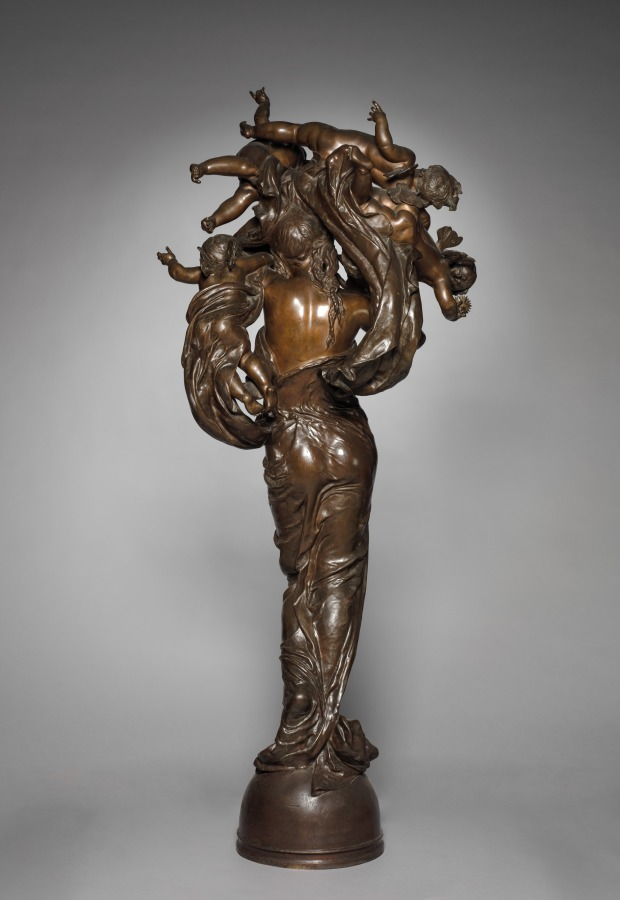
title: Dawn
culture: France, 19th century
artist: Gustave-Joseph Chéret (French, 1838–1894)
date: c. 1883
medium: bronze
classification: Sculpture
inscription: signed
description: This sculpture is of the same design as one exhibited by Chéret at the Paris Salon of 1883.